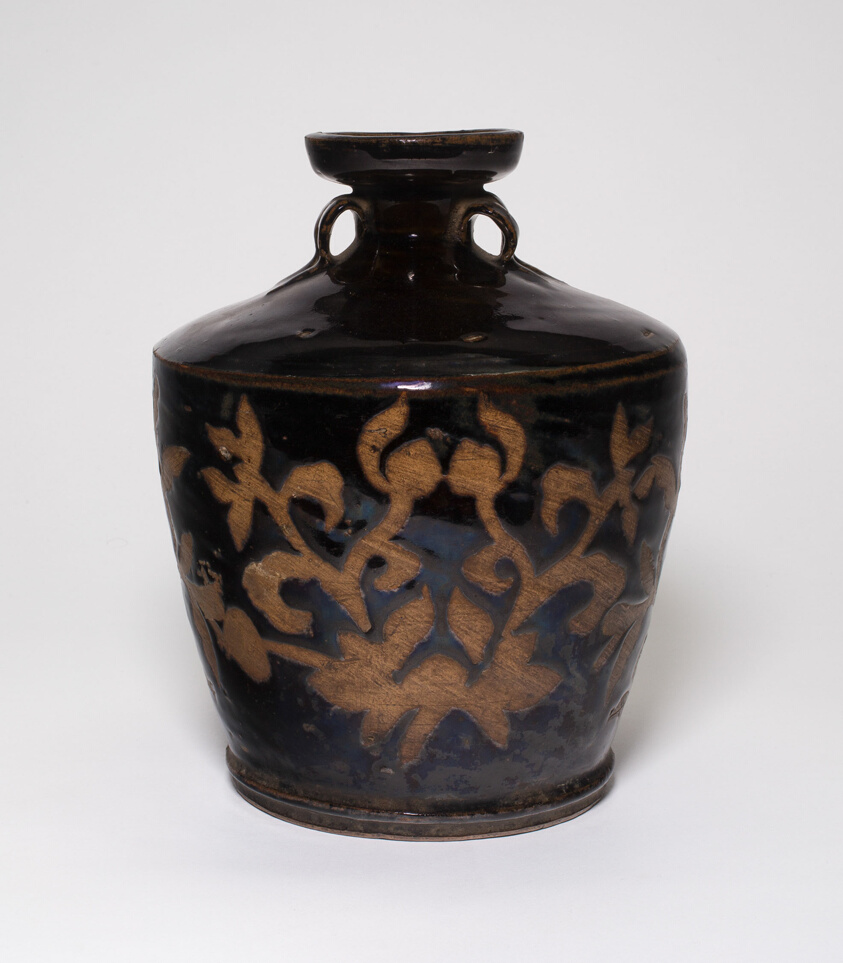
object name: Vessel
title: High Shouldered Jar with Loop Handles and Reserved Decoration of Stylized Floral Decor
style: Chinese (culture or style)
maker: China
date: Song dynasty (960–1279) or later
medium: Cizhou-type ware; stoneware with brown-black glaze and underglaze reserved decoration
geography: China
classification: stoneware; asian art; ceramics; vessel